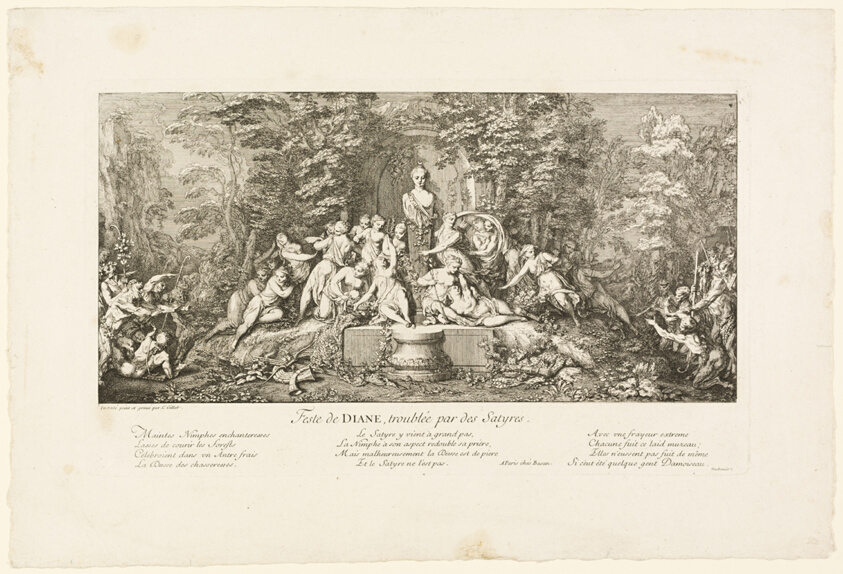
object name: Print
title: Feste de Diane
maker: Claude Gillot (French, 1673-1722)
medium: Etching on paper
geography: France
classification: etching; print; prints and drawing